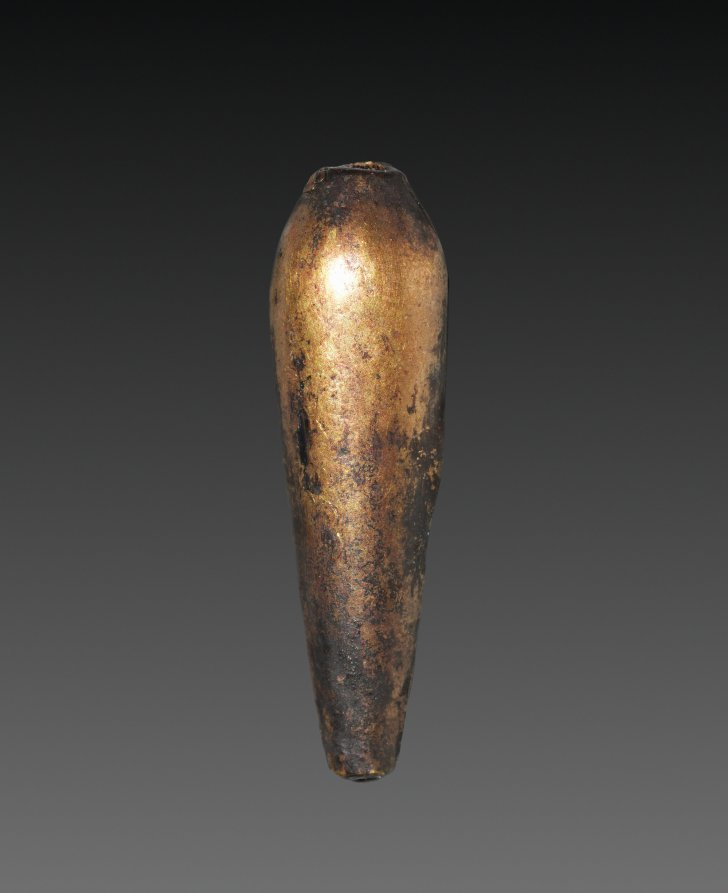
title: Teardrop-Shaped Bead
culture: Egypt, Middle Kingdom (2040–1648 BCE), Dynasty 12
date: 1980–1801 BCE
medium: gold over calcite gesso core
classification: Jewelry